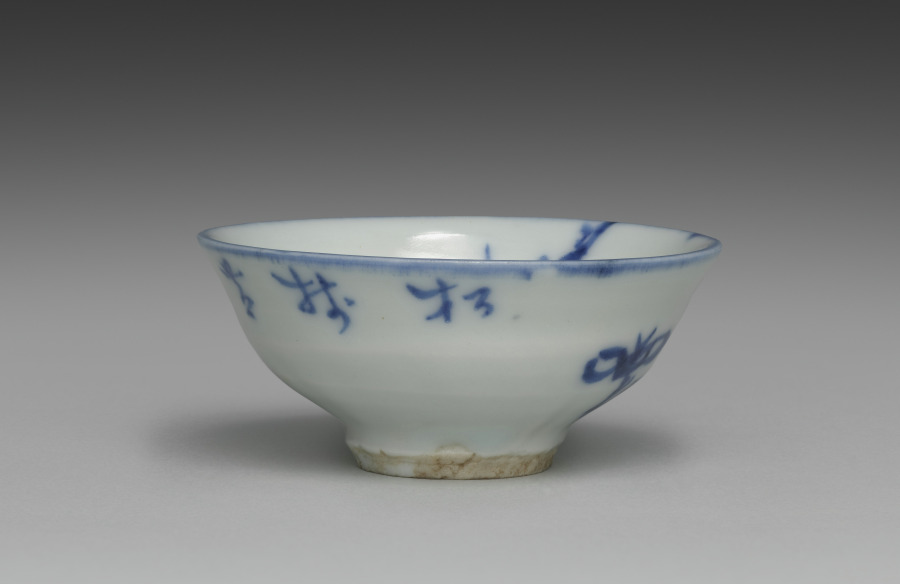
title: Sake Cup with Auspicious Plants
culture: Japan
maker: Seifū Yohei II (Japanese, 1844–1878)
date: 1861–78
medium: One of a pair of sake cups; porcelain with underglaze blue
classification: Ceramic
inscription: 松梅芝仙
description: Seifū Yohei II excelled as a painter, as evidenced by his floral and landscape designs. His works were selected as the best among Kyoto ceramics shown to jurists from Europe and the US, thus paving the way for international recognition of the studio in the late 1800s.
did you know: The plum and the pine are two of the "Three Friends of Winter," auspicious symbols of a cultured scholar's virtues: steadfastness, resilience, and flexibility.